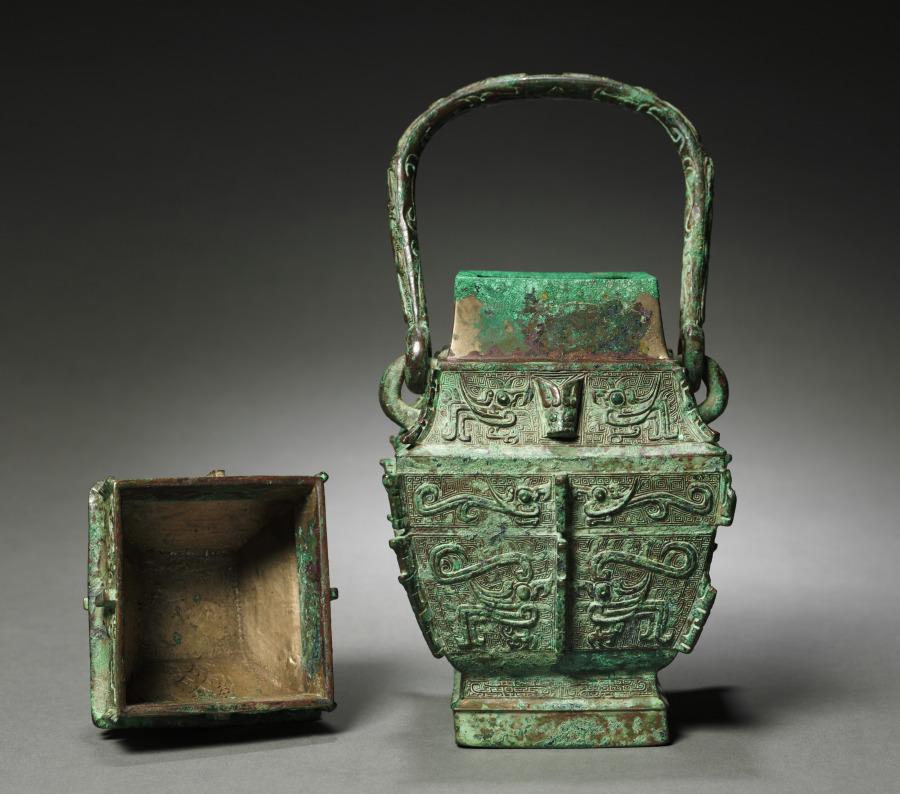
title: Square Wine Container (Fangyou)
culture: China, Henan province, probably Anyang, Shang dynasty (c. 1600–c. 1046 BCE), Anyang phase (c. 1250–1046 BCE)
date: c. 1250–1046 BCE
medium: bronze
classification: Metalwork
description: From the finely proportioned body to the elaborate decoration cast with great precision, this ritual wine vessel displays the artistic refinement and technical virtuosity that marked the full blossoming of late Shang bronze art. The dramatic contrast of the crested birds (kuifeng) against the dense background of spiral patterns (leiwen) gives the vessel a new force, clarity, and intense vitality. The distinctive square body also places it as a rare and important type among the more usual round or ovoid types.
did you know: The bird motif decoration of this bronze is uncommon; more often these bronzes are decorated with a combination of birds and dragons.